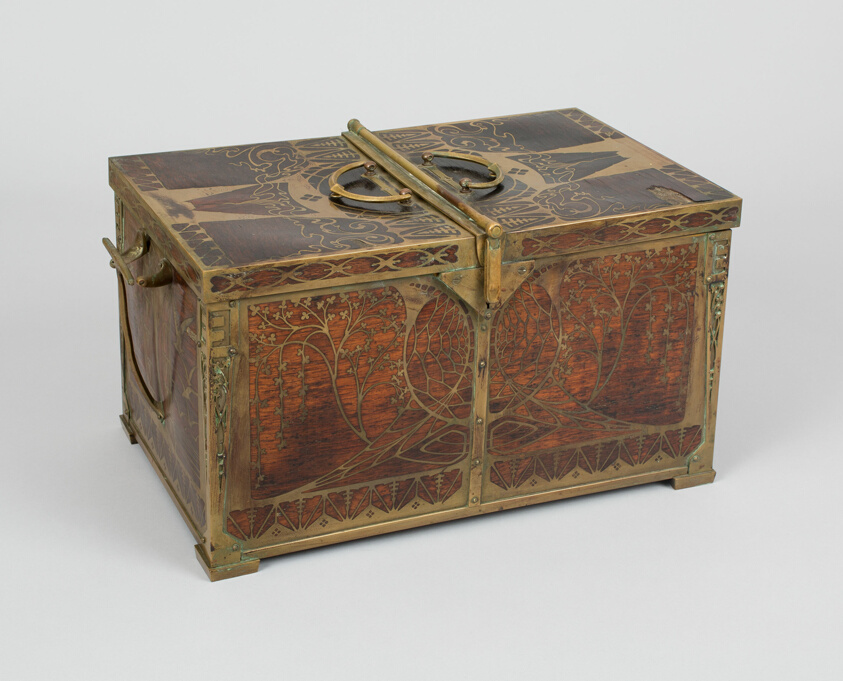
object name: Decorative Arts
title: Box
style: Art Nouveau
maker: Erhard & Söhne (Schwäbisch Gmünd, Germany, founded 1844)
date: c. 1900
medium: Rosewood; brass inlay and mounts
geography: Germany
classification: decorative arts